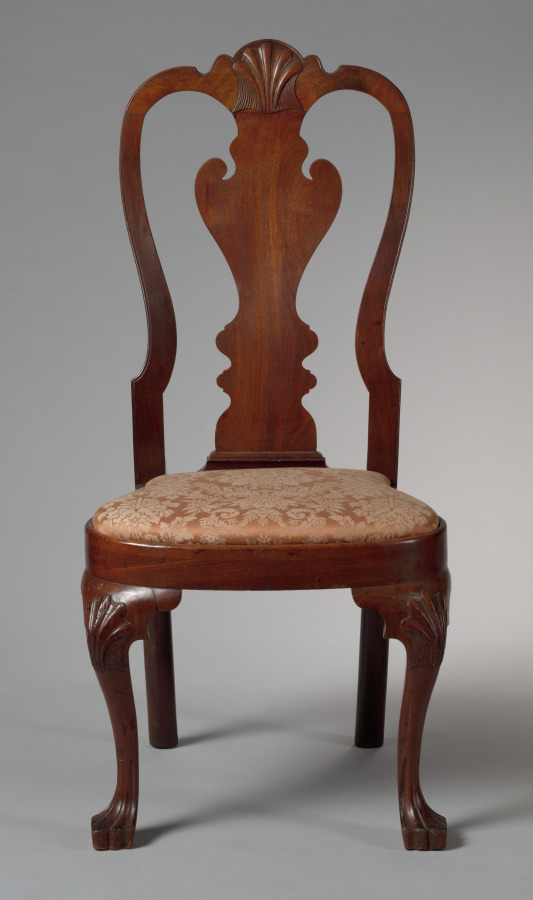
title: Side Chair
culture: America, Pennsylvania, Philadelphia, Queen Anne style, 18th century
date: 1735–1745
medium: walnut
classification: Furniture and woodwork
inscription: inscribed rear seat rail: "VIII."